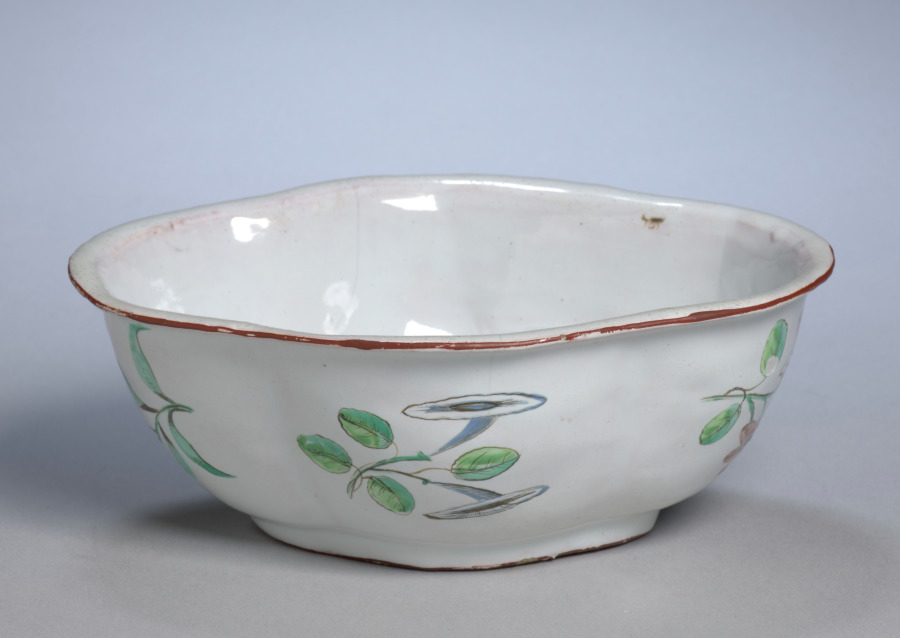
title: Sugar Basin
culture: France, 18th century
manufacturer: Sceaux Factory (French, active 1748–66)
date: c. 1750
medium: faience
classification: Ceramic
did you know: In medieval Italian churches, painted altarpieces served as a focal point for worshippers during the rituals of faith. The figures of Jesus, Mary, and eight saints are framed by a golden background that would have glistened in the flickering candlelight of the church.